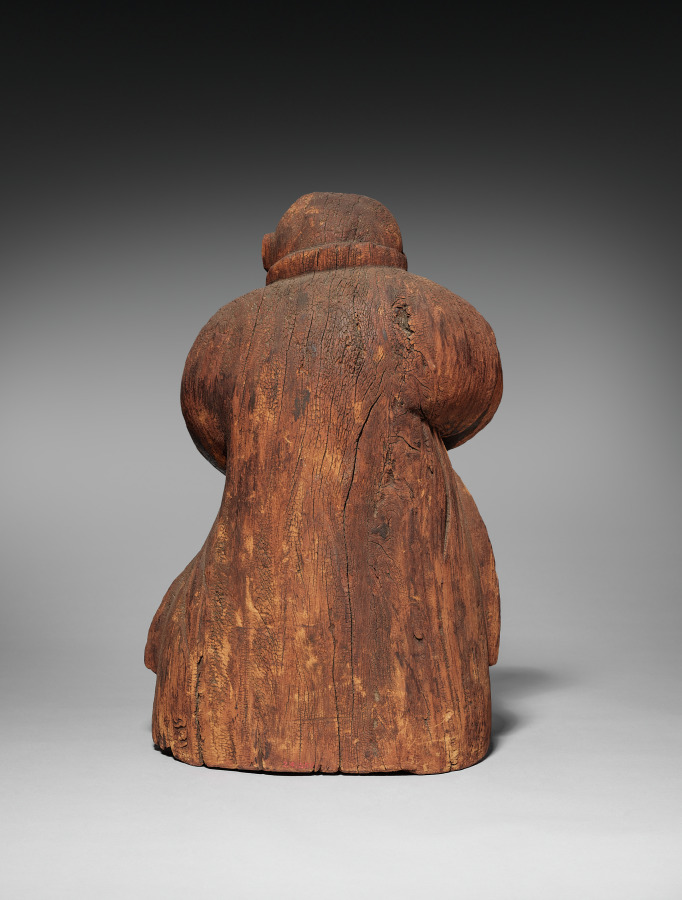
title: Monkey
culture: Japan, Edo period (1615–1868)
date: possibly 1700s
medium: wood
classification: Sculpture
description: Watching monkeys perform was once a popular form of street entertainment in Japan. Monkeys were outfitted with costumes and learned to perform dances and tricks. Monkeys also serve as the messengers of certain kami, or deities, and pairs of clothed monkey sculptures in wood or stone may be found on either side of the entrance of some jinja, or shrines dedicated to kami. This monkey has a jacket and may have once held bells and a fan. Unfortunately, its original identity and purpose have been lost.